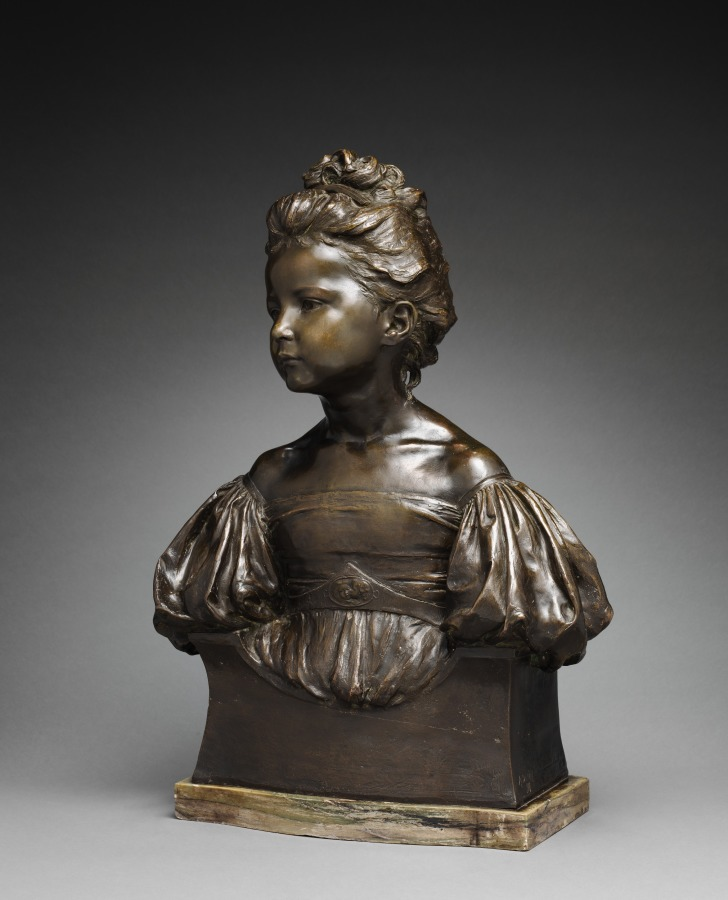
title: The Age of Innocence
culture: England, 19th century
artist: Alfred Drury (British, 1856–1944)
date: 1897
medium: bronze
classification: Sculpture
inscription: signed and dated: A. DRURY 97.